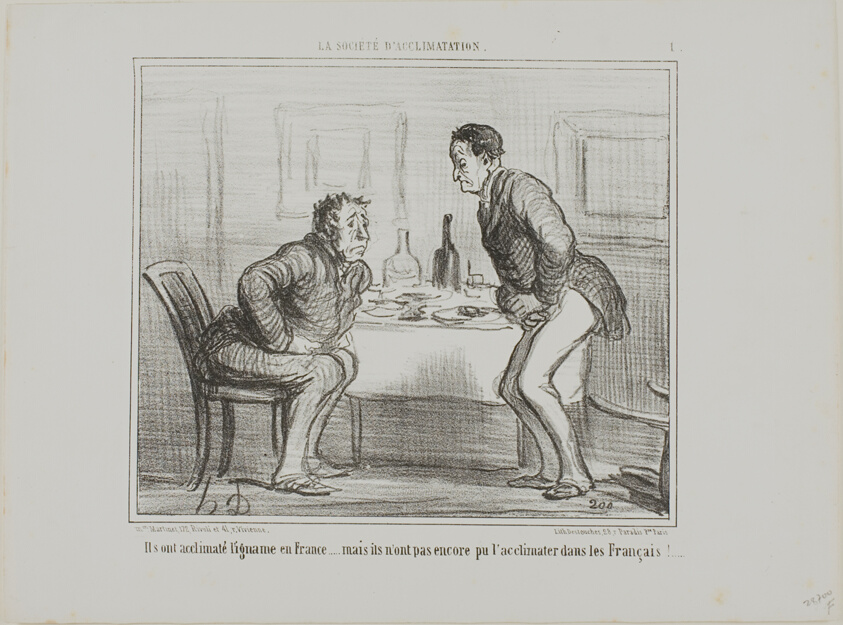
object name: Print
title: They succeeded in acclimatizing the Indian potato to the French climate, but it is still a problem to acclimatize the French to the Indian potoato!, plate 1 from La Société D'acclimatation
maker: Honoré Victorin Daumier; French, 1808-1879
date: 1858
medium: Lithograph in black on white wove paper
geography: France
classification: lithograph; print; prints and drawing